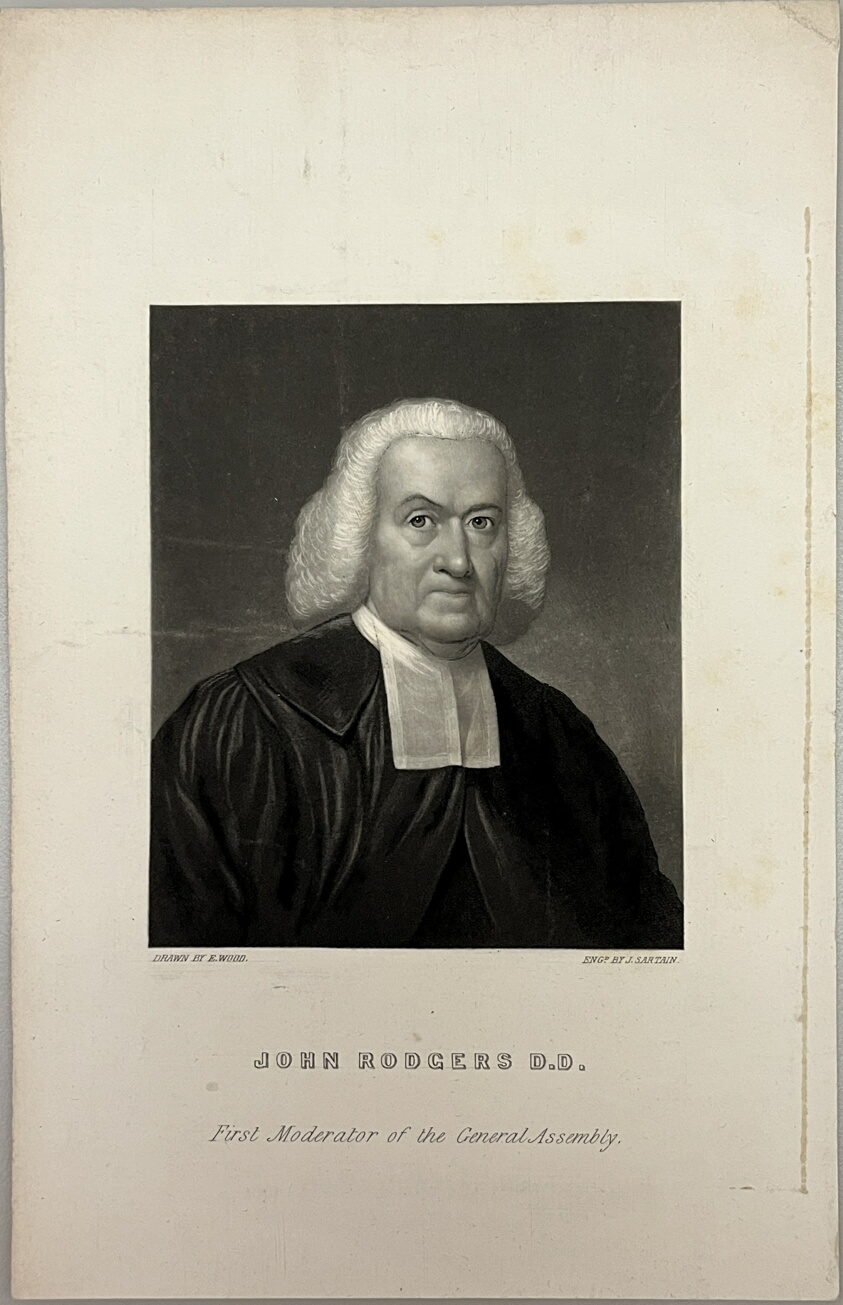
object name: Print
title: John Rodgers D.D.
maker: John Sartain (American, 1808-1897); after E. Wood (American, 19th century)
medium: Engraving and mezzotint on paper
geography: United States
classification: reproduction; print; prints and drawing